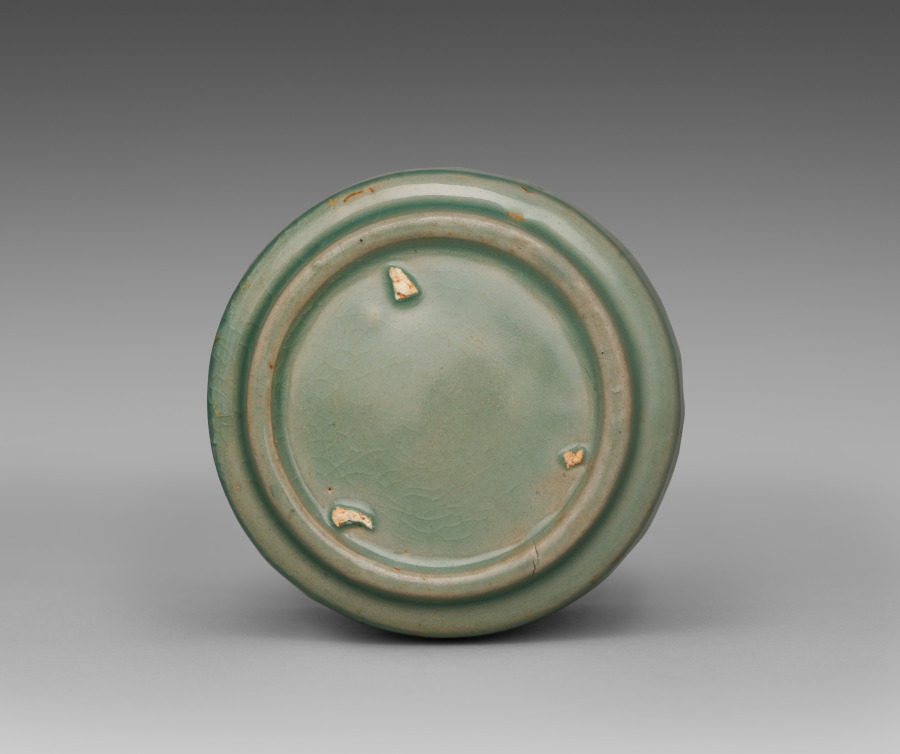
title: Celadon Cup with Molded Lotus Petal Design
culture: Korea, Goryeo dynasty (918–1392)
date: 1100s–1200s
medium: Celadon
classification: Ceramic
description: Celadon wares intended for everyday use—such as this dish—were among the most common burial objects placed in tombs during the Goryeo period (918–1392). Furnishing tombs with elaborate assemblages of objects was believed to honor the deceased and provide comfort in the afterlife. This dish, featuring the lotus petal motif, was likely a cherished possession that accompanied its owner to their final resting place.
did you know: The outer wall of this teacup is decorated with the image of lotus flower petal, a symbol of purity and salvation.